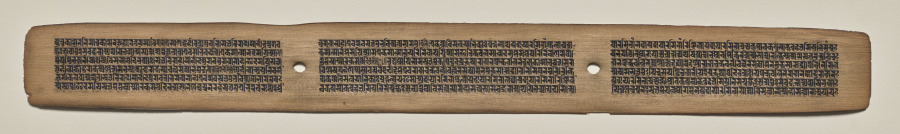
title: Text, Folio 83 (recto), from a Manuscript of the Perfection of Wisdom in Eight Thousand Lines (Ashtasahasrika Prajnaparamita-sutra)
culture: Eastern India, Bihar, Vikramashila Monastery. Painting: Nepal, Kathmandu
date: Sunday, September 14, 1119 (year 239 of the Newar Samvat in the month of Ashvina)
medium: gum tempera and ink on palm leaves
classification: Painting